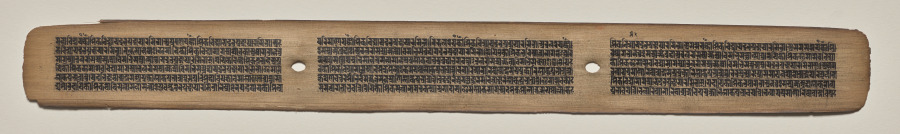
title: Text, Folio 26 (recto), from a Manuscript of the Perfection of Wisdom in Eight Thousand Lines (Ashtasahasrika Prajnaparamita-sutra)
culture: Eastern India, Bihar, Vikramashila Monastery. Painting: Nepal, Kathmandu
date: Sunday, September 14, 1119 (year 239 of the Newar Samvat in the month of Ashvina)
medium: gum tempera and ink on palm leaves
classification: Painting